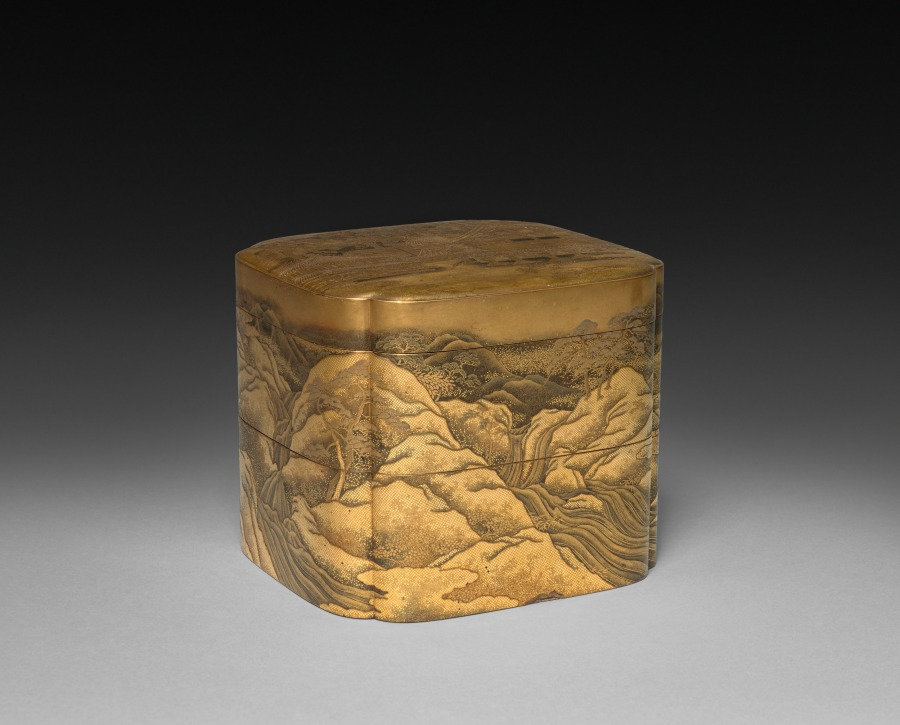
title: Covered Box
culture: Japan, Meiji period (1868–1912)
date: late 1800s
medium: wood with lacquer and gold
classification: Lacquer